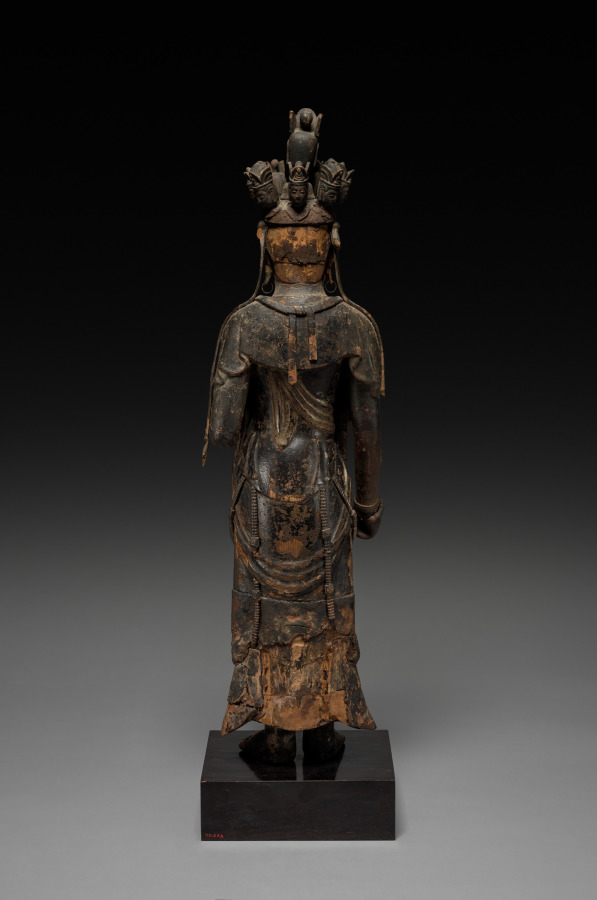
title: Eleven-Headed Guanyin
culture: China, Tang dynasty (618–907)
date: late 600s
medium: wood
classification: Sculpture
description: Guanyin, the bodhisattva of infinite compassion, can be identified by his attributes, carrying a tiny Amida Buddha in his crown, and holding a bottle with the nectar of life in his left hand. The eleven-headed Guanyin, in particular, has his eyes and ears open in all directions to hear, see, and help all those who are in distress. The garment and jewelry of this graceful figure remind us that the historic Buddha Shakyamuni was originally an Indian prince before he reached enlightenment. Upon his death, he entered nirvana, an eternal state free of desire and suffering, outside the realm of birth, death, and rebirth. The dating and attribution of the figure as being from China needs further study.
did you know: The sculpture was made of different types of wood with different grain sizes and patterns, which are connected with wood pegs and glue.